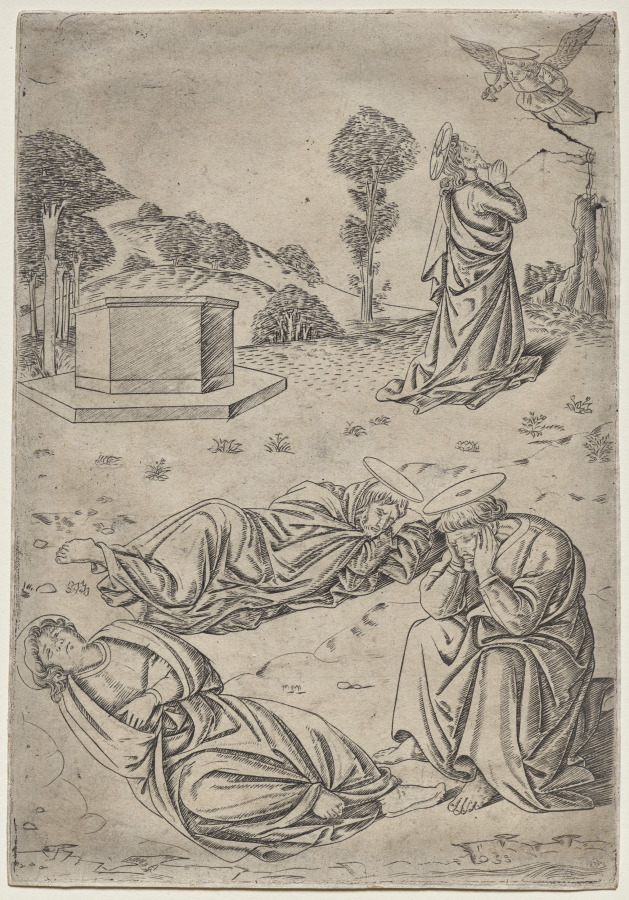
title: Agony in the Garden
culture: Italy, Florence, 15th century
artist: Francesco Rosselli (Italian, 1448-about 1513)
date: c.1490–1500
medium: engraving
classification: Print